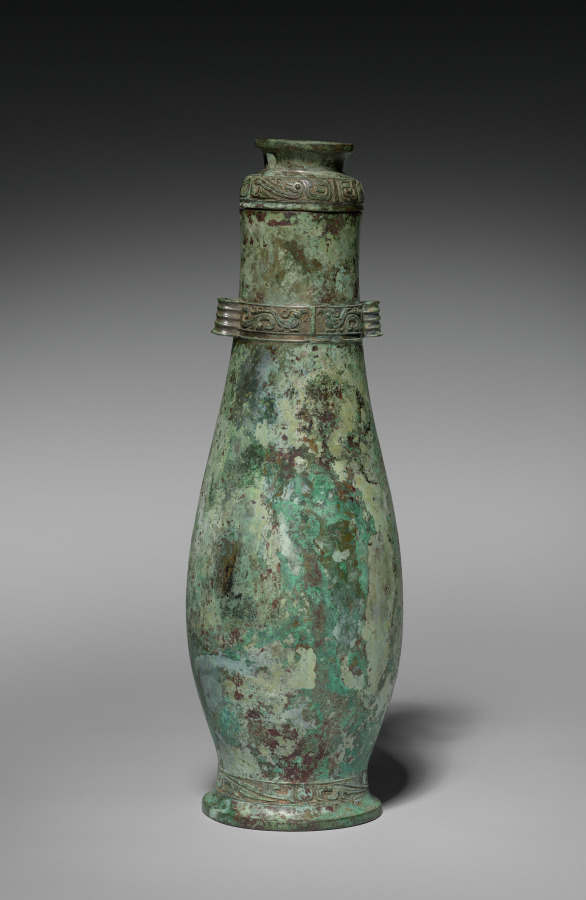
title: Wine Vessel (Hu)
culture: China, Western Zhou dynasty (c. 1046–771 BCE)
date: c. 1000–900 BCE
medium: bronze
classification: Metalwork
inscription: inscription inside top (cup): 事从作壺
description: This tall, slender bronze wine vessel, called a hu, has three bands of ornamentation: one above the foot, one around the neck, and one on the cover. Stylized birds or phoenixes are in the band around the neck, while the band on the cover and foot feature geometric dragons. The dragon and the phoenix may represent yin and yang and would be equally appropriate on a bronze of either secular or religious purposes. When inverted, the cover forms a cup. It likely held liquids like wine at festive banquets or religious ceremonies. The cylindrical "handles" at the neck band suggest that the vessel was carried by a cord.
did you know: This vessel was cast by the cire perdue, or lost wax, process.